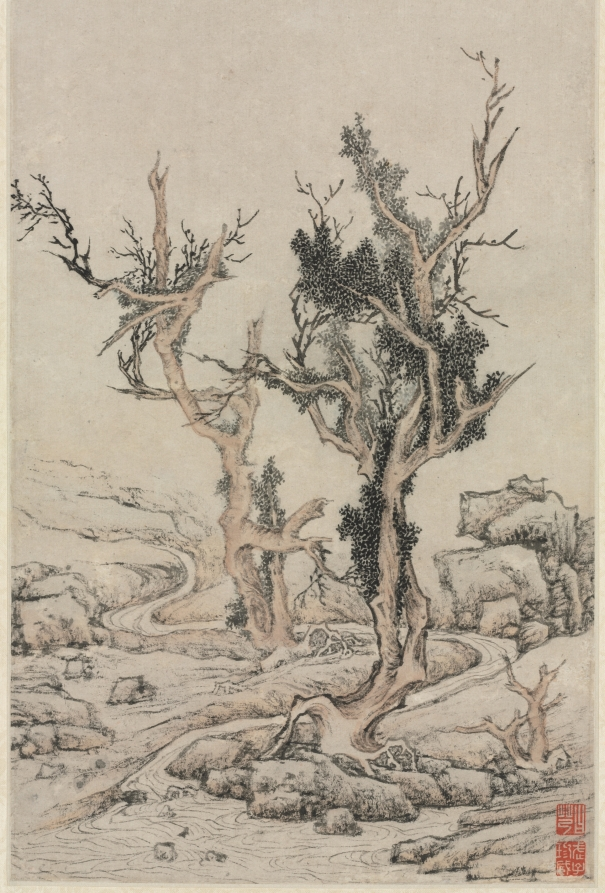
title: Old Trees by a Wintry Brook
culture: China, Ming dynasty (1368–1644)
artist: Wen Zhengming (Chinese, 1470–1559)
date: 1551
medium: hanging scroll, ink and light color on paper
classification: Painting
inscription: 辛亥五月望徵明戲寫古木寒泉 時年八十二 [印] 徵明; 停雲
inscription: 2 additional seals of Mou Yueqi 繆曰芑 (18th century).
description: Wen Zhengming was one of the most celebrated calligraphers and painters during the Ming dynasty (1368–1644). His inscription, gracefully written in small characters on the upper left corner, reveals Wen’s emotional mood at that moment of creation. "In the fifteenth day of the fifth month, the year of xinhai [1551], [I], Zhengming, playfully write this Old Trees by a Wintry Brook at eighty-two [sui]." How should we understand a wintery landscape painted in the middle of spring? Was it simply inspired by a surprisingly late spring snow? Or can it be that the “wintery” brook reflects the octogenarian’s feelings about aging and his inevitable, approaching mortality? The junipers’ gnarled forms are a poignant symbol of aging and suffering, yet the ink-dot leaves on some branches suggest that the trees are still alive, awaiting the warmth of spring.